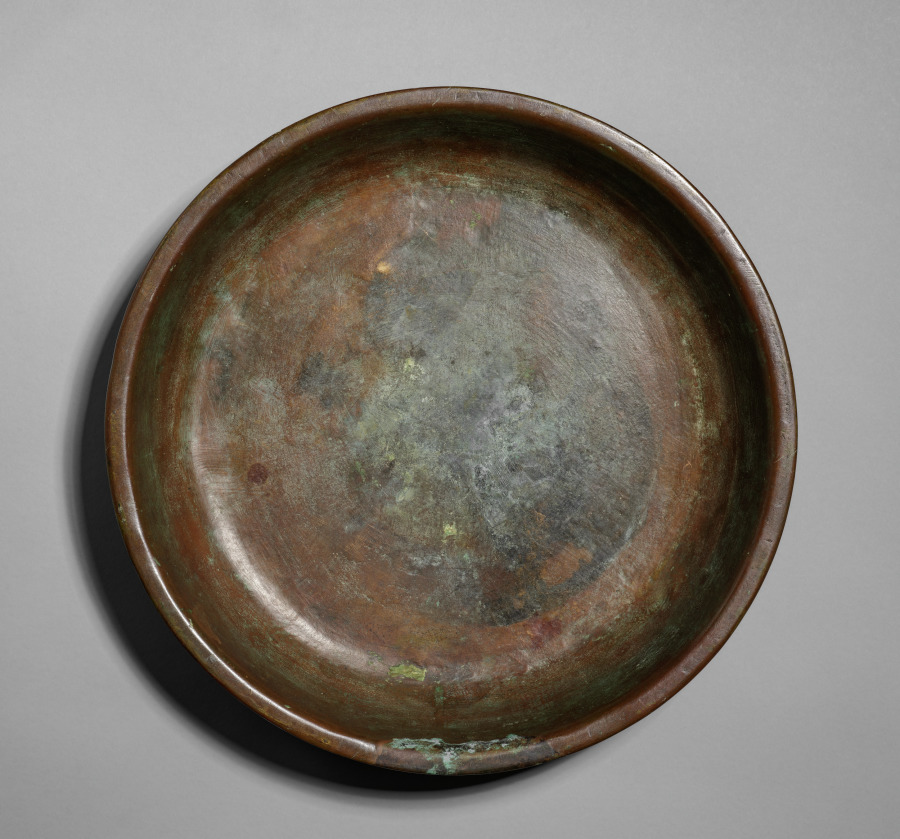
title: Basin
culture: America, New York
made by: Gorham Manufacturing Company (America, est. 1831)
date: early 1900s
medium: bronze, greenish black artificial patina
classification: Metalwork